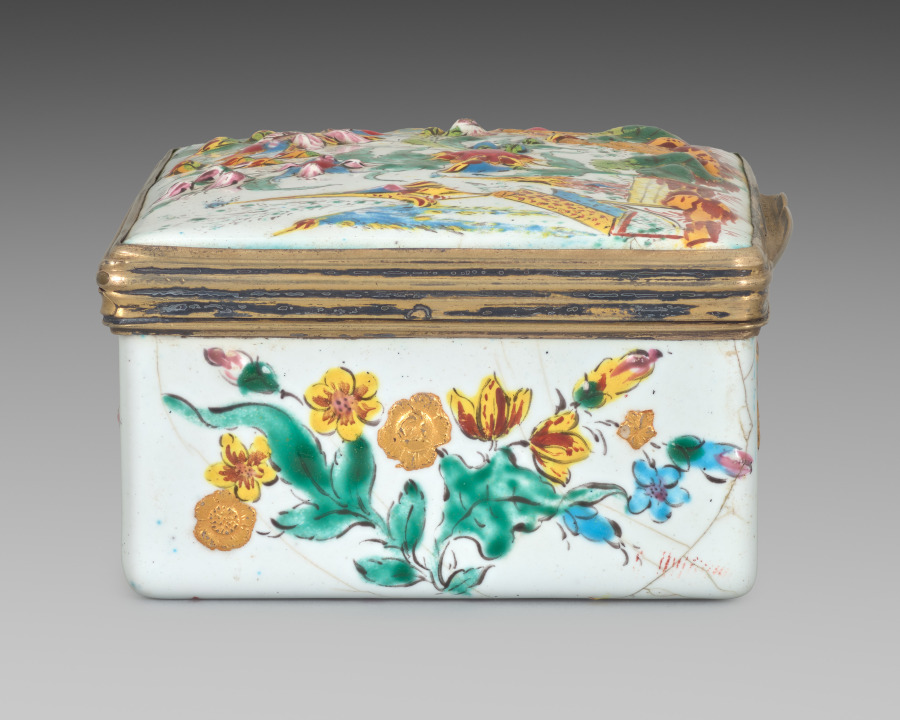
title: Box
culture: France, 18th century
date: 1749–50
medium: silver gilt and enamel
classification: Enamel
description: Chinoiserie in 18th-century France incorporated imitations of East Asian motifs, designs, and ornaments into European art. These imitations were often distorted by the European imagination and were not accurate representations of the cultures from which they drew inspiration. Elements of chinoiserie in this box can be seen primarily on the lid where enormous, vibrantly colored flowers tower over two crouching figures and a grouping of buildings.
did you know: The flower petals on the box lid are raised, an effect produced by drops of transparent enamel placed on the box’s surface that imitates polished gemstones or pearls.